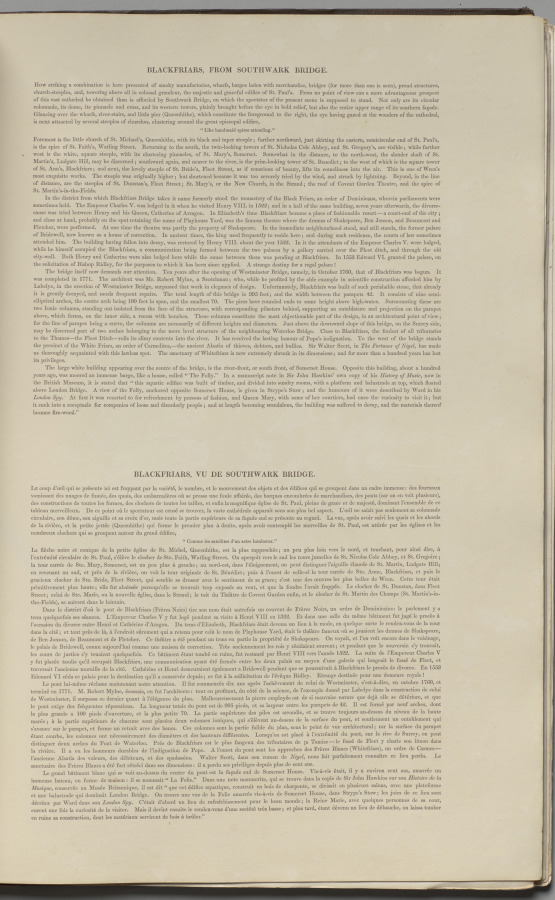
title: London As It Is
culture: England, 19th century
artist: Thomas Shotter Boys (British, 1803–1874)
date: 1842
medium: lithograph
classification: Bound Volume